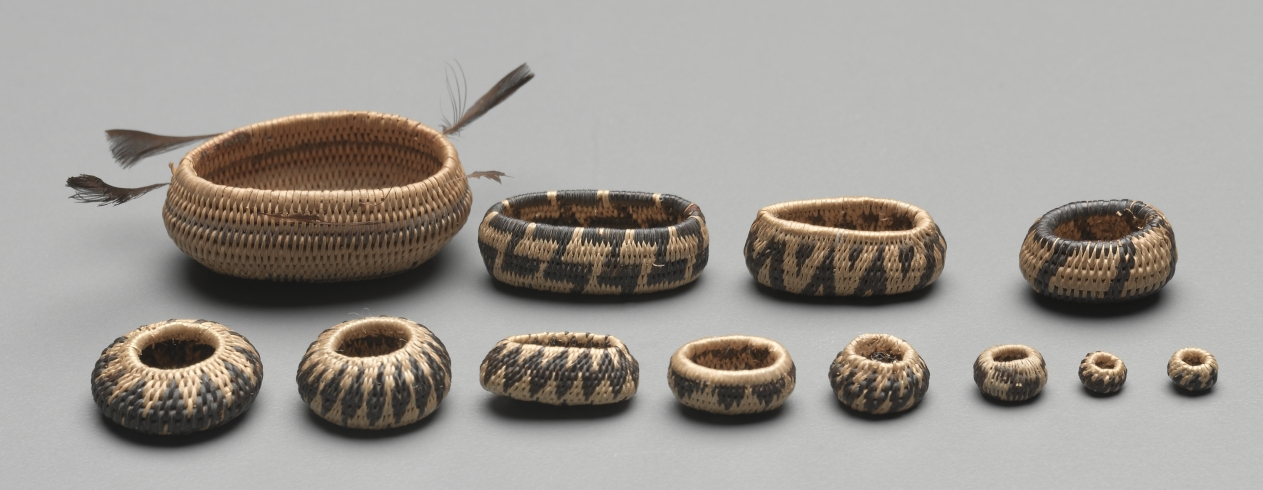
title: Miniature Rhomboidal Basket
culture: California, Pomo, late 19th-early 20th century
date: late 1800s-early 1900s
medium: plant materials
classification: Basketry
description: Miniature baskets were made to demonstrate the basket-maker’s virtuoso skill, and these tiny marvels seem to be no exception—the smallest are just a few millimeters wide but still patterned. For such fine work, dexterity was required as much for preparation of materials as for weaving.